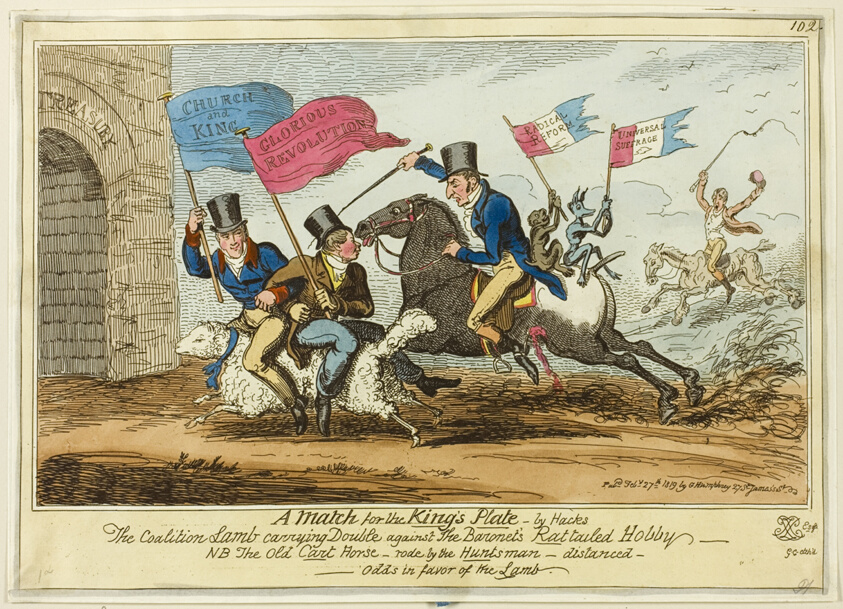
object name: Print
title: A Match for the Kings Plate-By Hacks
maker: George Cruikshank (English, 1792-1878); published by George Humphrey (English, c. 1773-1831)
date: published February 27, 1819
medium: Hand-colored etching on paper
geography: England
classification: etching; print; prints and drawing